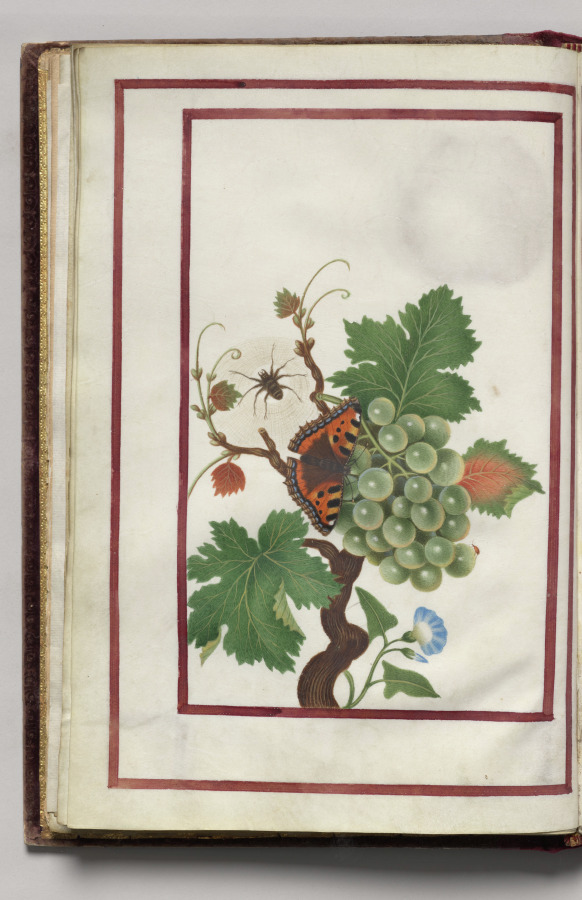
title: Morning Glory, Cluster of Grapes, and Spider, folio 10 (verso), from Florilegium (A Book of Flower Studies)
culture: France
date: 1608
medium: watercolor, ink, silver, and gold over occasional traces of pencil, on vellum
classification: Bound Volume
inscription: Dated: Poitiers 1608 (on frontispiece) Signed: On frontispiece in black ink, lower right: Van Kuyk Notation on drawing: Frontispiece: in pencil, lower margin: * élève de Van Kessel, peintre flammand (* in pencil also appears in front of Van Kuyk's name).